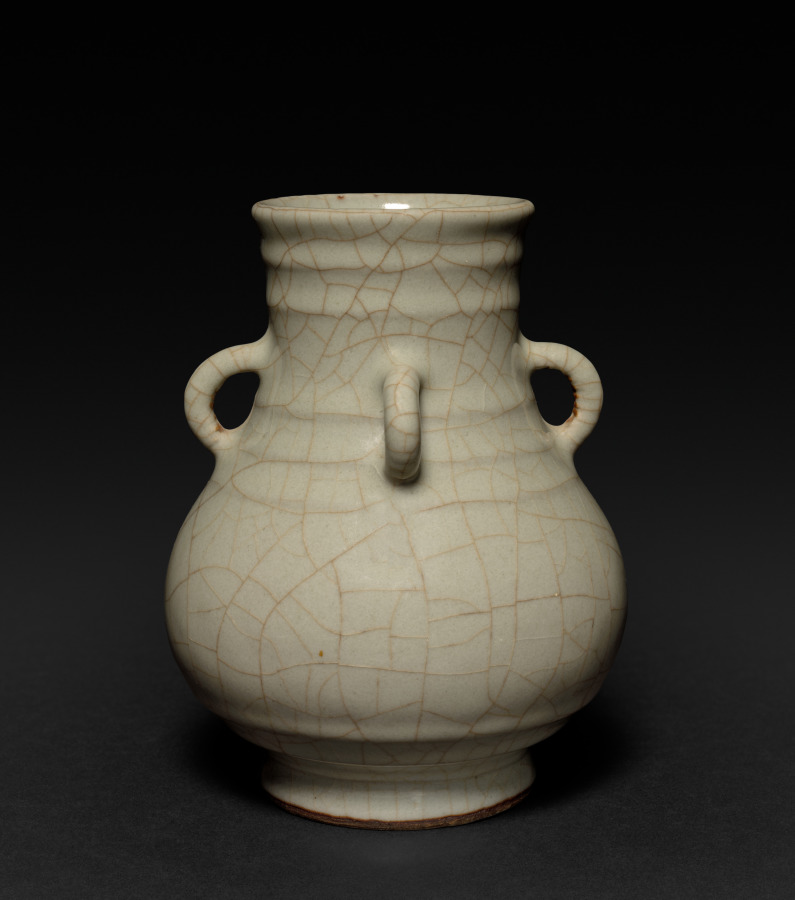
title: Vase: Guan type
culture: China, Qing dynasty (1644-1911)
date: 1700s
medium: porcelain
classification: Ceramic